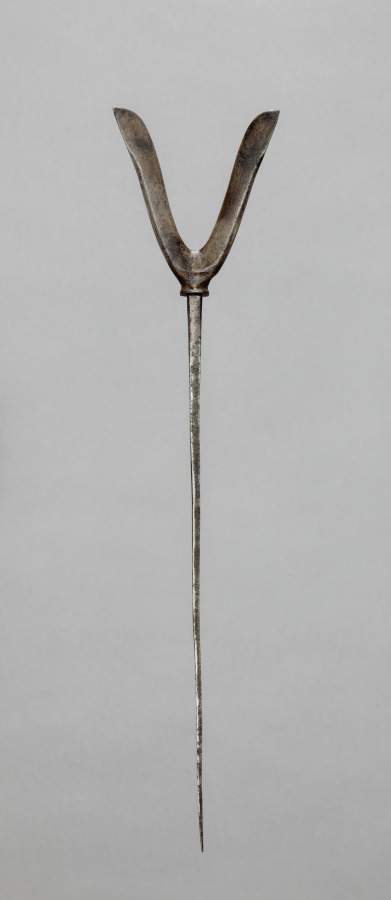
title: Arrow Point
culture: Japan, Edo period (1615–1868)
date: 1700s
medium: steel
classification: Arms and Armor